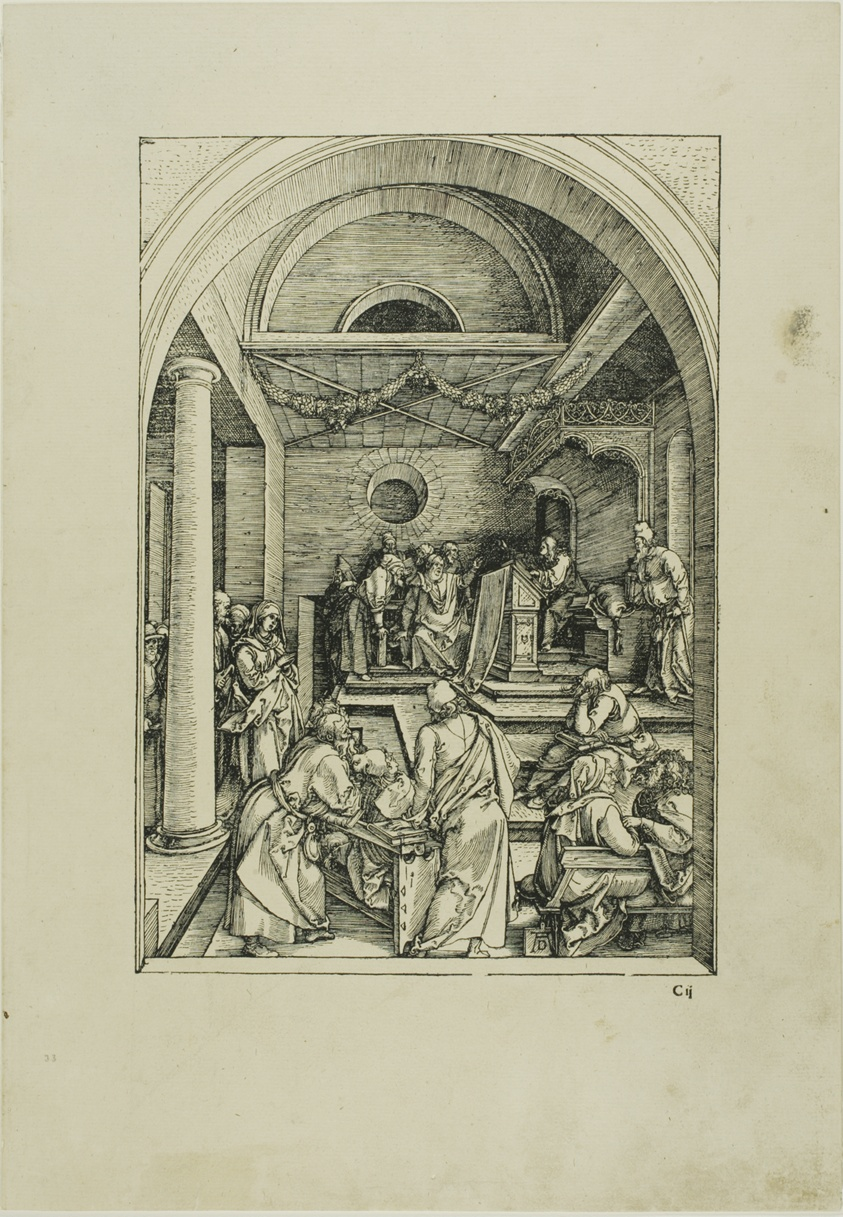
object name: Print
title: Christ Among the Doctors, from The Life of the Virgin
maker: Albrecht Dürer (German, 1471-1528)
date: c. 1503, published 1511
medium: Woodcut in black on ivory laid paper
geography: Germany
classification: woodcut; print; prints and drawing; paper